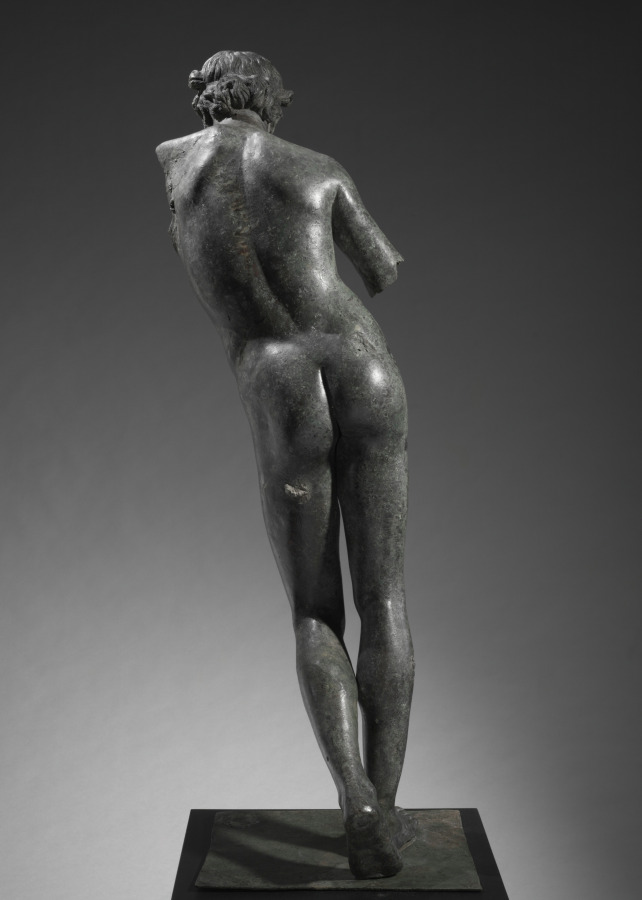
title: The Cleveland Apollo: Apollo Sauroktonos (Lizard-Slayer) or Apollo the Python-Slayer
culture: Greece, Athens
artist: attributed to Praxiteles (Greek, Athenian, c. 400–330 BCE)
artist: or Follower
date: c. 350–200 BCE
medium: bronze, copper and stone inlay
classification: Sculpture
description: The Cleveland Apollo was cast in multiple sections using the indirect lost-wax technique. First, molds were taken from a working model (now no longer known or preserved), which was then reproduced in hollow wax sections, each filled with a clay core. After details were added to the wax models, each was encased in clay. Then, the wax was heated, melted out, and replaced by molten bronze. Once cooled, the hollow bronze sections were fused together and finished, patching flaws and adding inlays and other details. Since the initial model was retained, it could be reused, allowing ancient sculptors to create multiples and variations of favorite works. Thus, remarkably, the Cleveland Apollo may once have been one of several such works. The consistently thin walls of the Cleveland Apollo (mostly 5-6 mm thick), together with the nearly invisible joins between most cast sections, show that it was created by highly skilled sculptors and foundry workers. Close looking reveals several noteworthy features. First, ovals atop the right foot mark a fusion weld, where molten bronze pooled to join separately cast sections. Second, small rectangular bronze patches cover parts of the surface (especially the right hip), each carefully cut and then hammered into place over holes or other casting defects. Inlaid lips, nipples, and eyes (the right ancient stone, the left now a modern replacement) added to the lifelike appearance of the sculpture, contrasting with the once bronze-colored skin. Finally, radiography helps to illuminate hidden features, such as the cast edge of the neck of Apollo.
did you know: Ovals across the top of the right foot show a clear join between separately cast sections.